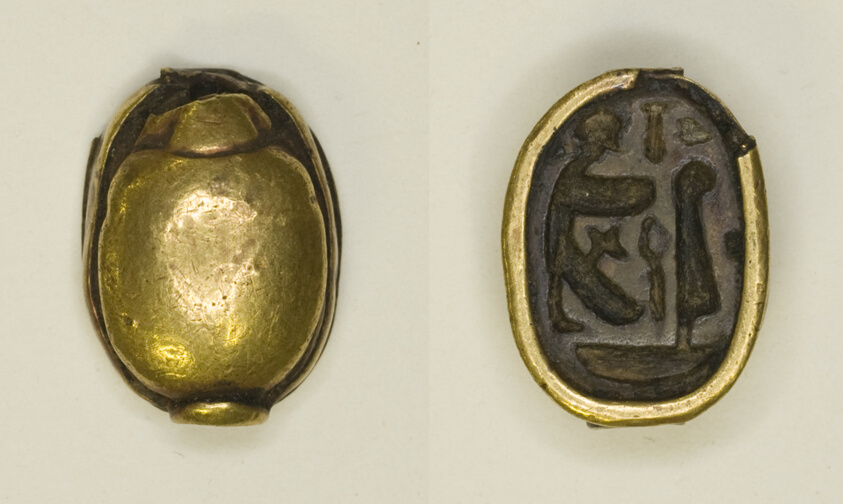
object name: Costume and Accessories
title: Scarab: Hieroglyphs and Figures (Re-Harakhti, nb- and ma'at signs)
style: new kingdom, ancient, egyptian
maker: Egyptian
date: New Kingdom, Dynasty 18–20 (?) (about 1550–1069 BCE)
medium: Gold and stone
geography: Egypt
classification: scarab; gold; metal; ancient art; costume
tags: scarab beetle, insects, Hieroglyphs